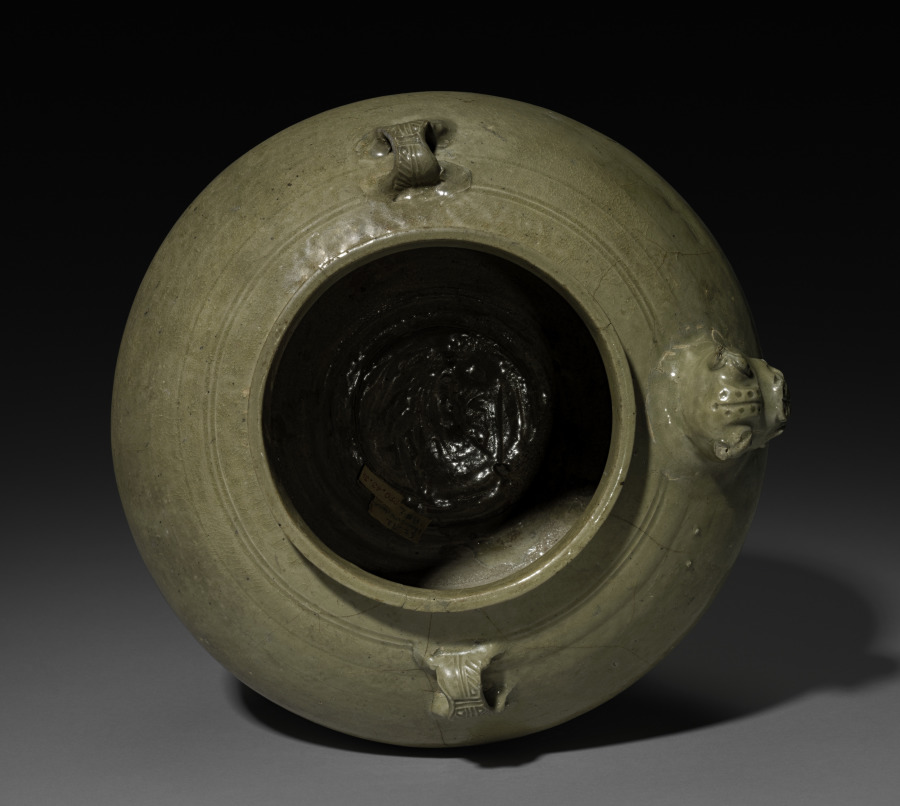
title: Jar with Tiger-Headed Spout: Yue Ware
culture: China, Western Jin dynasty (265-316 CE)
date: late 200s–late 300s CE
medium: glazed stoneware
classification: Ceramic